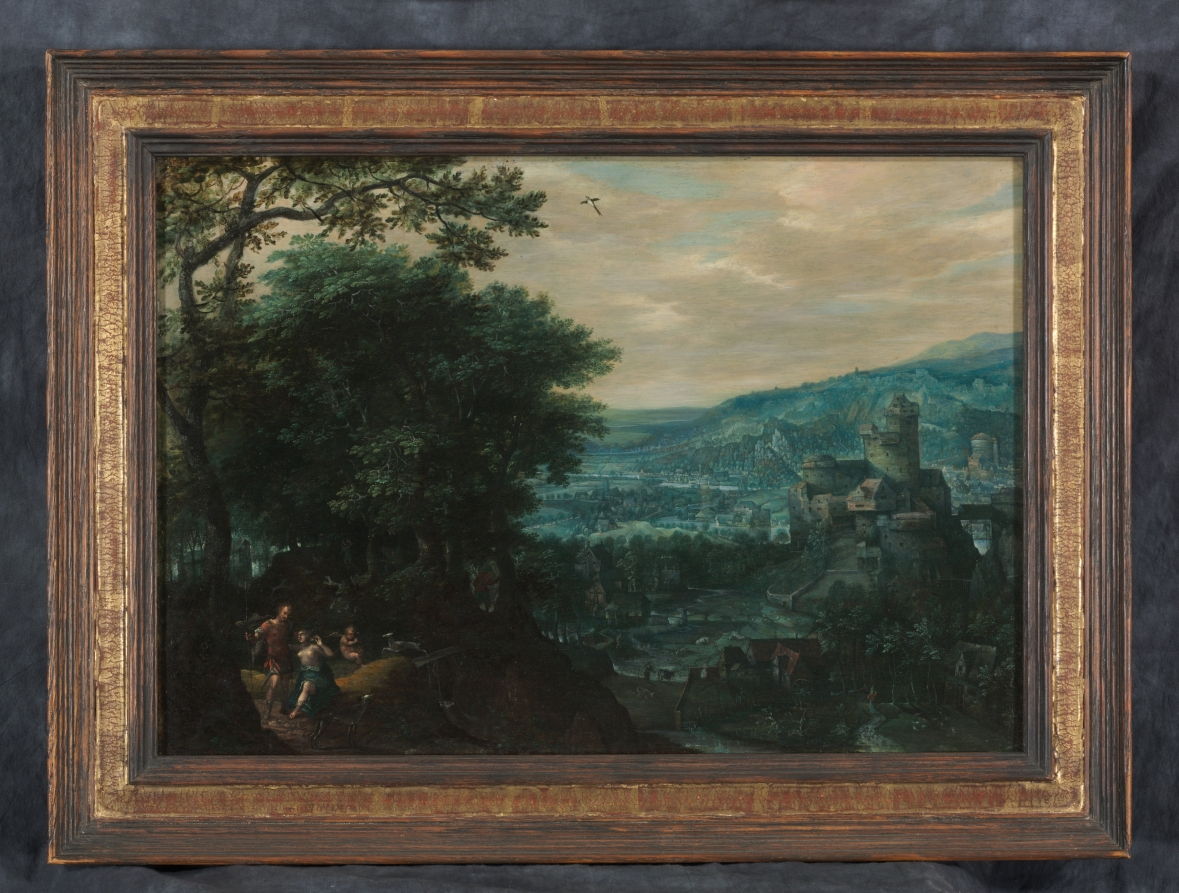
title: Landscape with Venus and Adonis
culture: Netherlands, 16th century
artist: Gillis van Coninxloo (Netherlandish, 1544–1607)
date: 1580s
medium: oil on copper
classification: Painting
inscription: Signed lower left: "GLVC [monogram]"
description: Venus, the goddess of love, is unsuccessful in dissuading her mortal lover Adonis from hunting the boar that would eventually kill him. The artist nestles this story in the foreground of an expansive view with Germanic architecture, rather than a classical setting. Woodlands were relatively new subjects in European painting and this work points toward the full-blown forested landscapes of the 1600s.